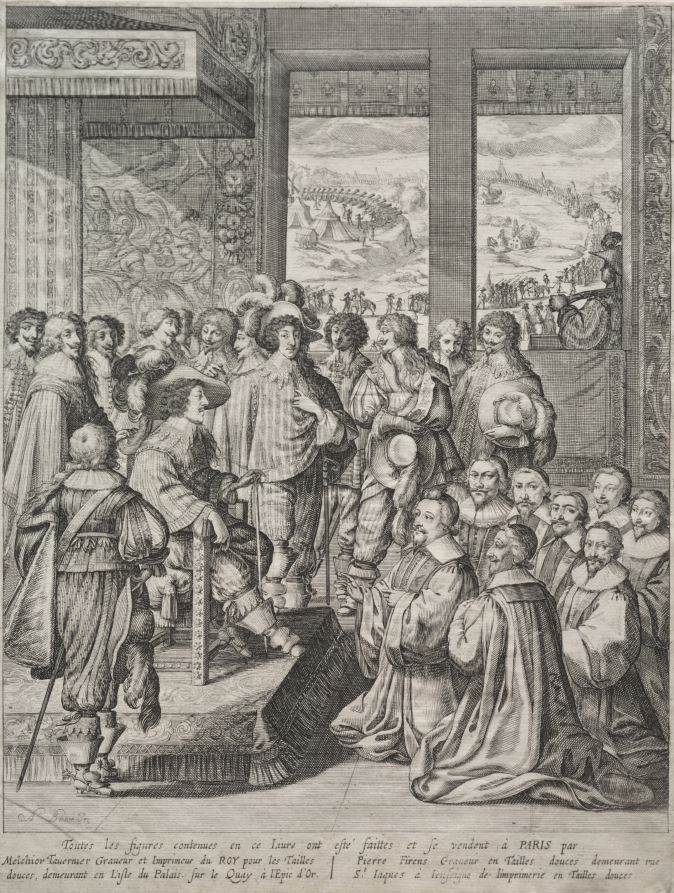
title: Louis XIII Receiving a Deputation of Magistrates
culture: France, 17th century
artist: Abraham Bosse (French, 1602–1676)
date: c. 1617–43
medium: etching and engraving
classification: Print